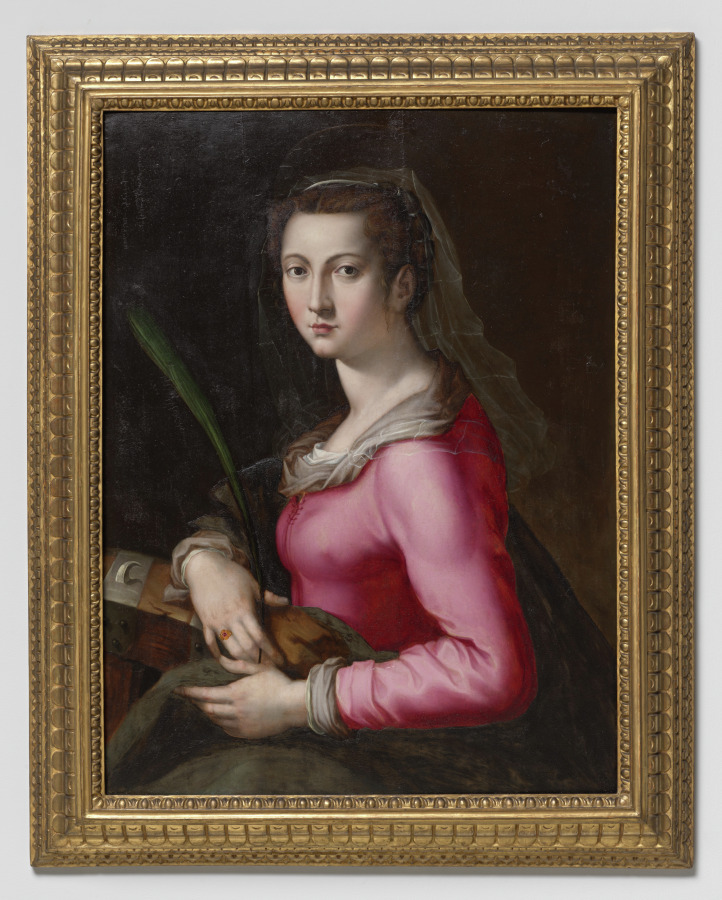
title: Portrait of a Woman as Saint Catherine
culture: Italy, 16th century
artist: Pier Francesco Foschi (Italian, 1502–1567)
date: c. 1560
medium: oil on wood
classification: Painting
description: Saint Catherine of Alexandria, a Christian, was martyred for refusing to make sacrifices to idols as decreed by the pagan Roman emperor Maxentius. While Maxentius first attempted to slay Catherine with spiked wheels, the machine broke when she prayed for salvation, and the emperor subsequently beheaded her. Catherine is identified in portraits through objects related to her martyrdom, such as a broken wheel, or a palm branch symbolizing the victory of the eternal spirit over mortal flesh. In sixteenth-century Florence, patrician women were often portrayed as such exemplary figures, indicating the virtues of the sitter.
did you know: The spiked wheel identifies this woman as the Christian martyr Saint Catherine.